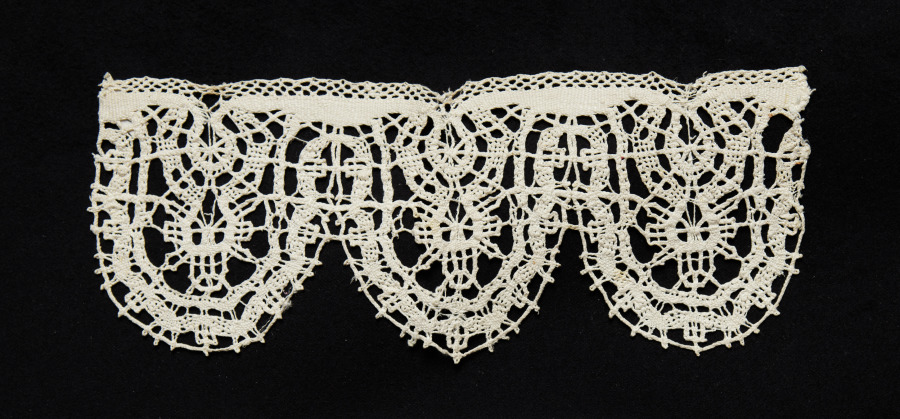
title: Lace Edging of Round Points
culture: Italy, Genoa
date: 1600s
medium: Bobbin lace (needle lace design)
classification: Lace